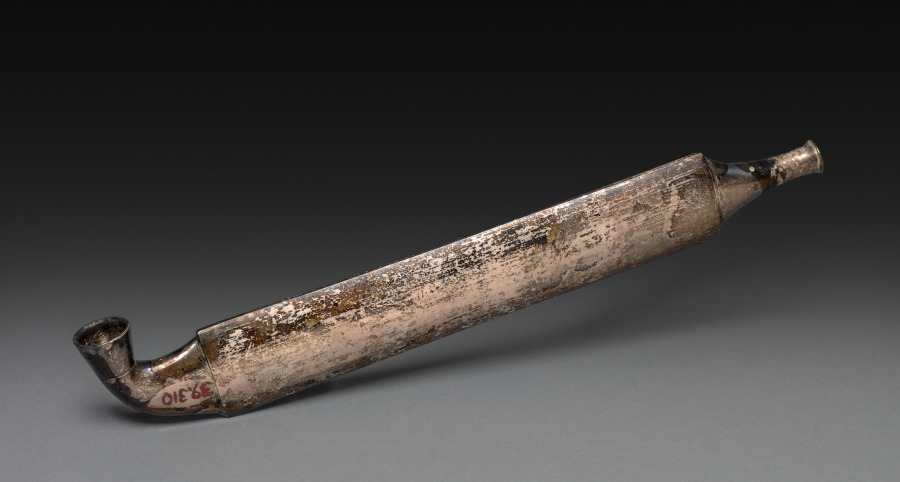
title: Tobacco Pipe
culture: Japan, Edo period (1615–1868)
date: early to mid-1800s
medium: silver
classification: Miscellaneous